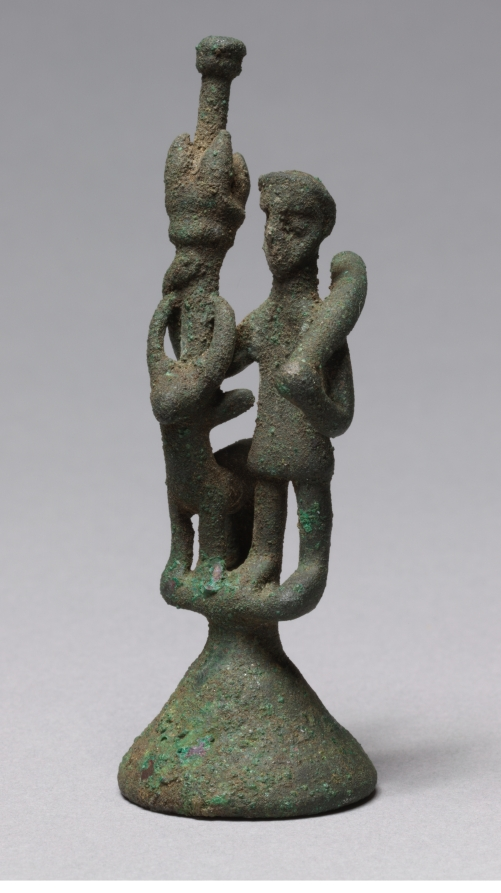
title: Warrior and Bull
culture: Sardinia, probably Nuragic culture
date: c. 800–500 BCE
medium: bronze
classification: Sculpture